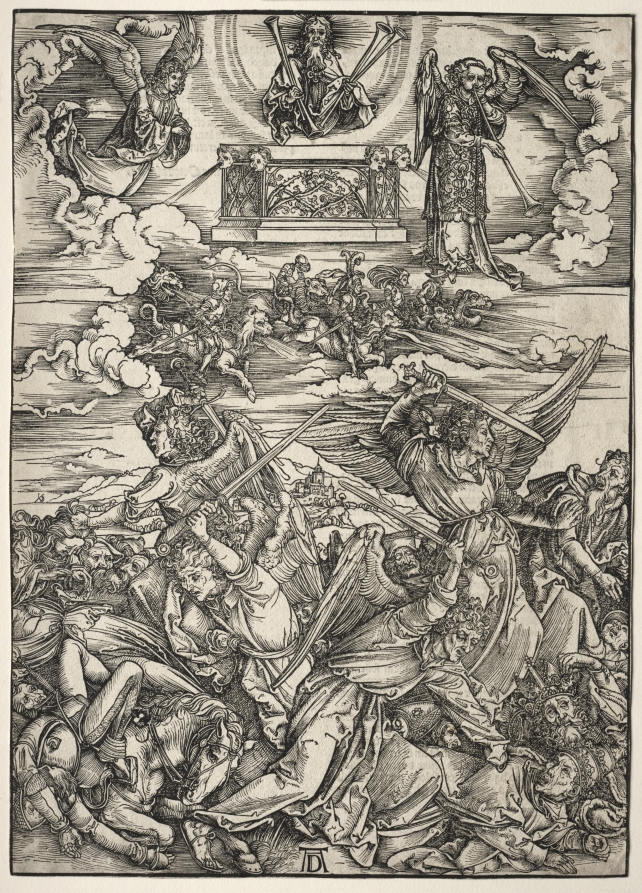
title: Revelation of St. John: The Four Destroying Angels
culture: Germany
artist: Albrecht Dürer (German, 1471–1528)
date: 1511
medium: woodcut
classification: Print